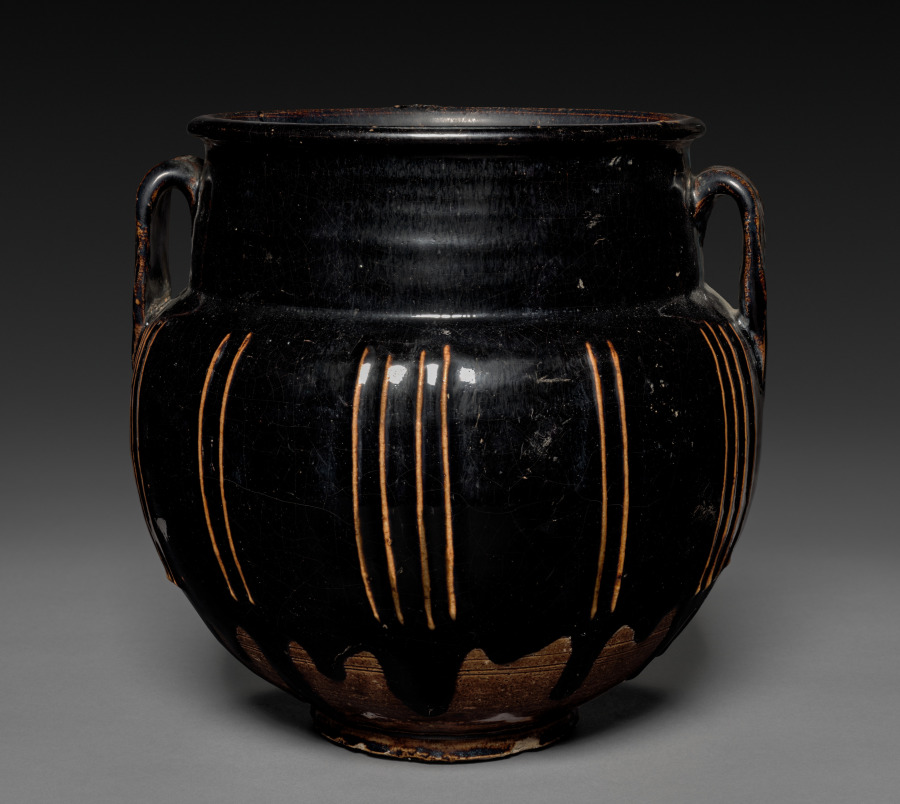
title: Jar with Handles and Vertical Ribs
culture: China, Yuan dynasty (1271-1368)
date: 1271–1368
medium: Glazed stoneware, Cizhou ware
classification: Ceramic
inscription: 張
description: Cizhou ware of the Yuan period with surviving handles is extremely rare and important. This ribbed jar has the characteristic dark brown or black glaze.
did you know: Each handle is molded with the character zhang 張.